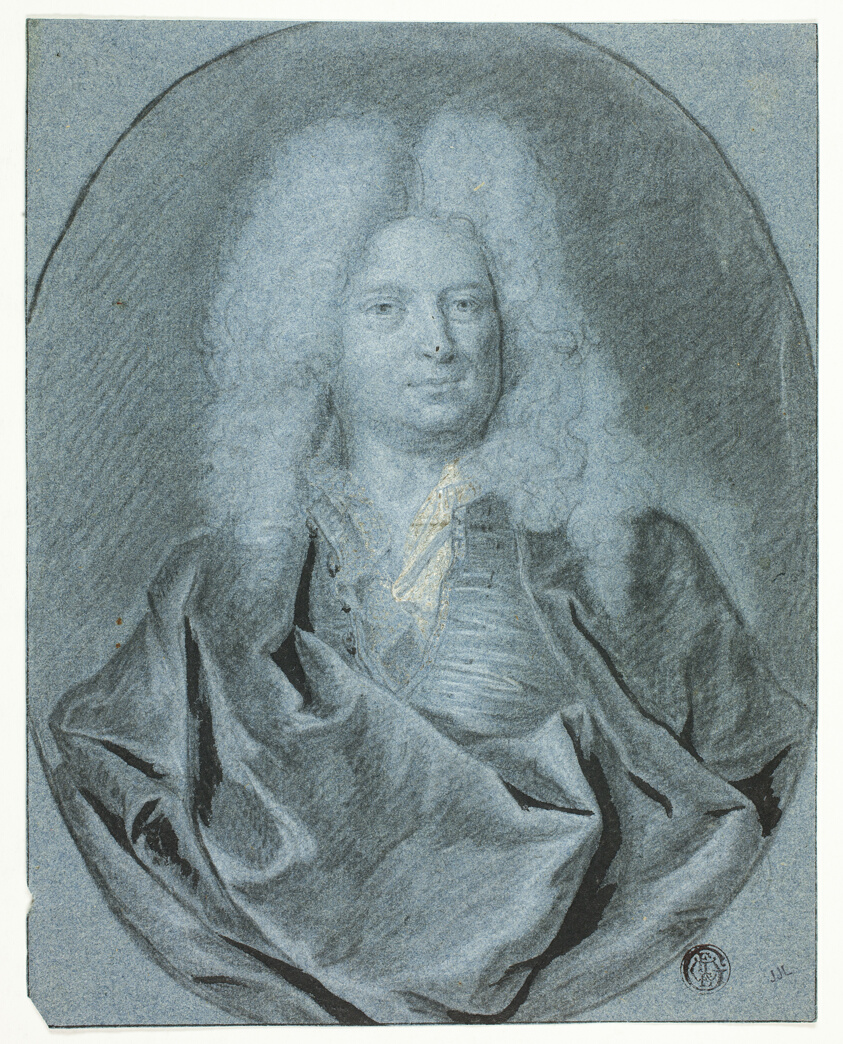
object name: Drawing and Watercolor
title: Portrait Bust of a Man in a White Wig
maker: Possibly Cornelis van Poelenburgh (Dutch, 1594/95-1667); or an unknown artist (Dutch, 17th or 18th century)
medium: Black chalk, heightened with white chalk and lead white (discolored), with brush and black ink, on blue laid paper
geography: Netherlands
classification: chalk; drawings (visual works); prints and drawing